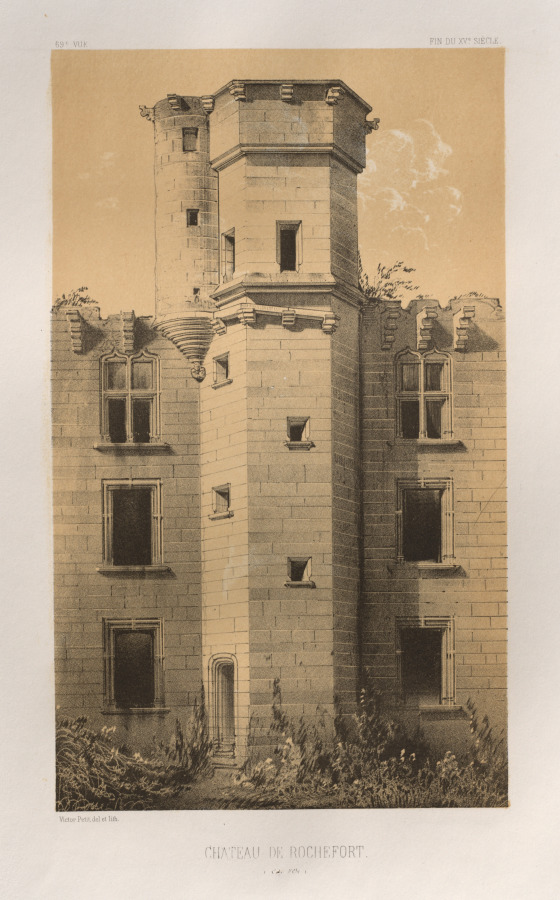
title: Architecture Pittoresque ou Monuments des XVeme. Et XVIeme. Siecles: Chateaux de France des XV et XVI Siecles: Pl. 69, Château de Rochefort (Côte d'Or)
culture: France, 19th century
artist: Victor Petit (French, 1817–1874)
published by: Charles Boivin (publisher and editor); Lith de Godard a Paris (printer)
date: 1860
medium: lithograph with tint stone, from portfolio of 100 lithographs with tint stone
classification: Print